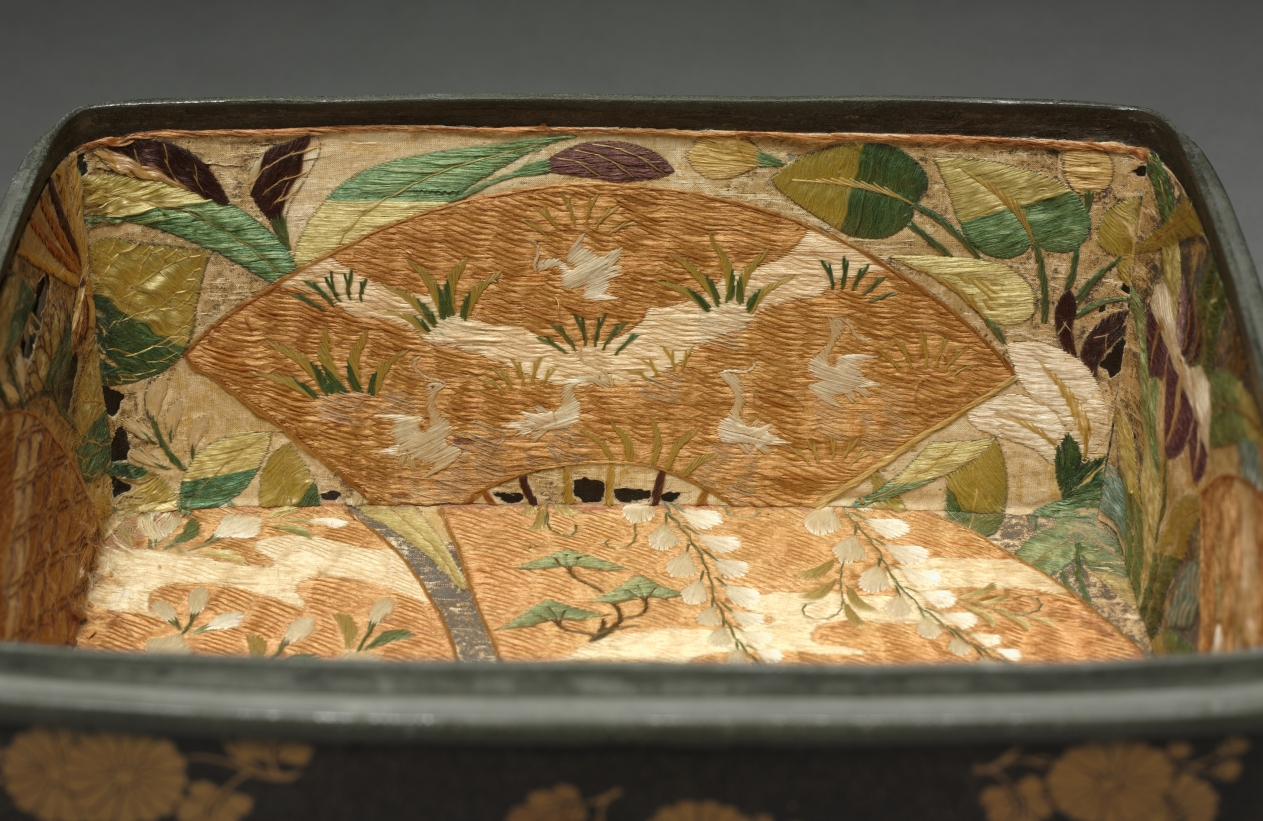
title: Cosmetics Box with Chrysanthemums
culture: Japan, Kamakura period (1185–1333)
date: early 1300s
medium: lacquer on wood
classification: Lacquer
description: In China, the chrysanthemum was historically appreciated for its association with the Double Nine Festival and the reclusive life of the poet Tao Yuanming (AD 365-427). In Japan, the 16-petaled chrysanthemum came to symbolize the Japanese imperial family after Emperor Gotoba (1180-1239) chose the motif as his personal emblem, having it applied to his sword and everyday utensils. This box proves that the flower also appeared on lacquer wares as early as the Kamakura period.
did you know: In Japanese, this type of small box is called a tebako, literally a hand box, and was typically part of a cosmetics set.